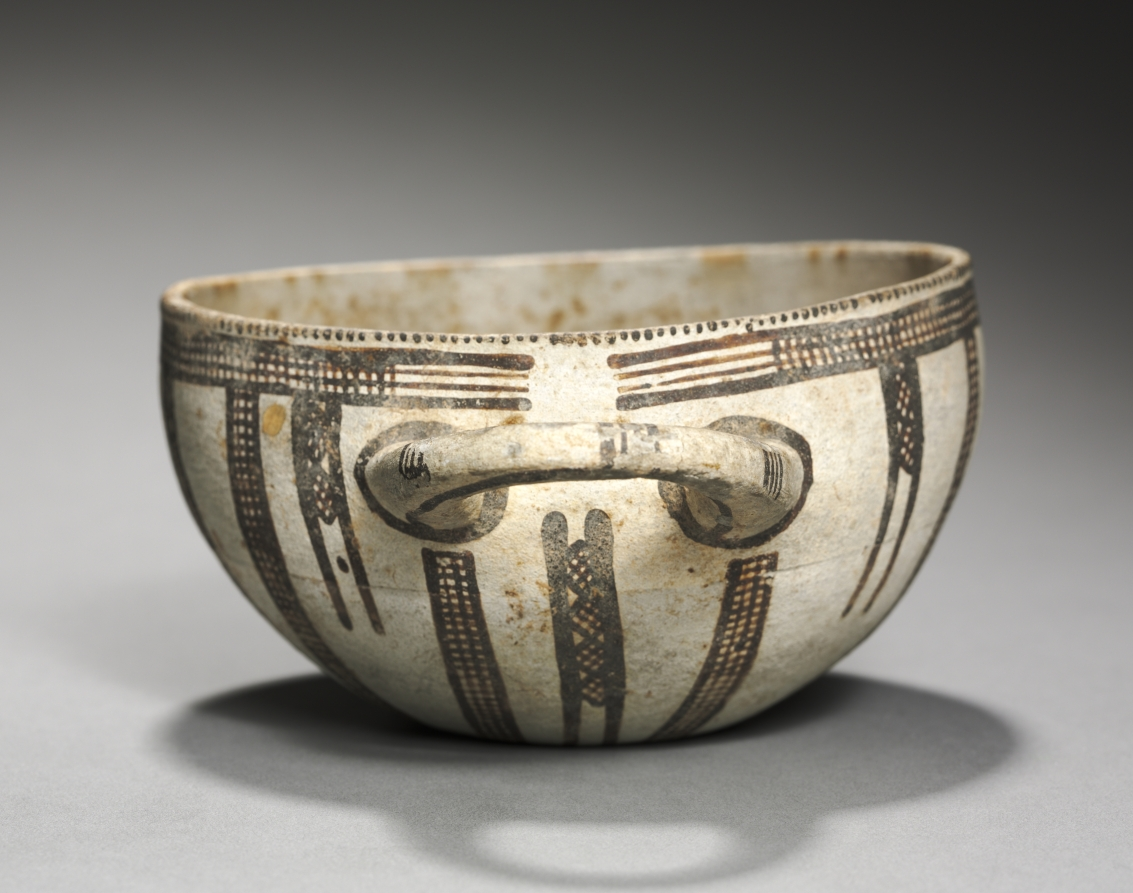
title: One-Handled Bowl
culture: Cyprus, late Cypriot II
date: c. 1450–1200 BCE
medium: white slip ware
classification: Ceramic